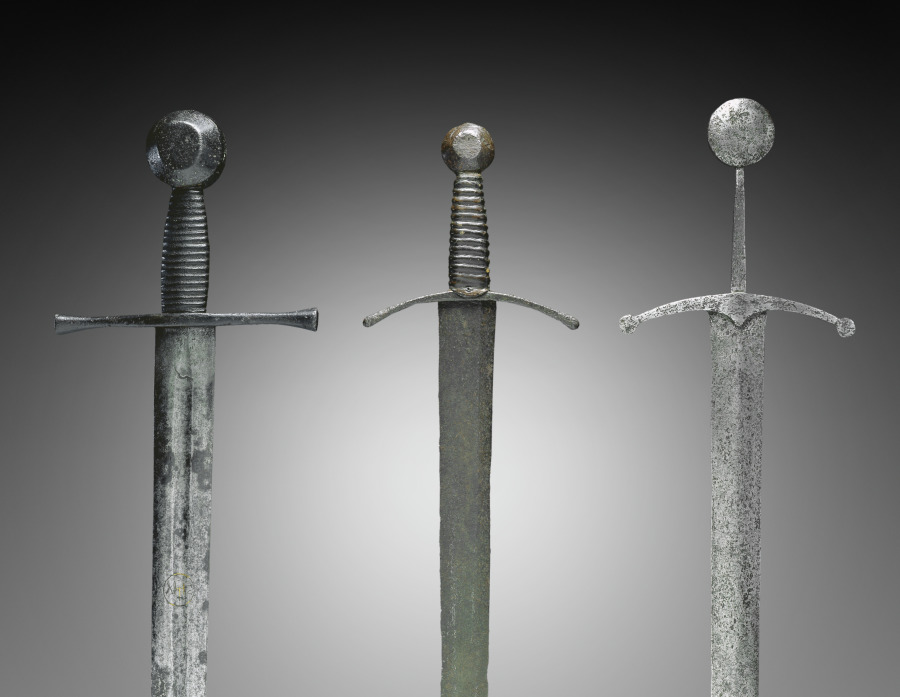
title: Sword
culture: European, early 15th century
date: c. 1400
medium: steel, leather, wire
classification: Arms and Armor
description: The principal weapon of the European knight was his sword, a simple weapon with a broad, two-edged blade, a straight crossguard, and a round pommel or counterweight. The pommel gave the knight full mastery of a perfectly balanced weapon. The basic shape of the sword did not change significantly between 1200 and 1500.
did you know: A sword required a different composition of steel than armor; as a result swordsmithing centers of Europe differ from those that specialized in armor.